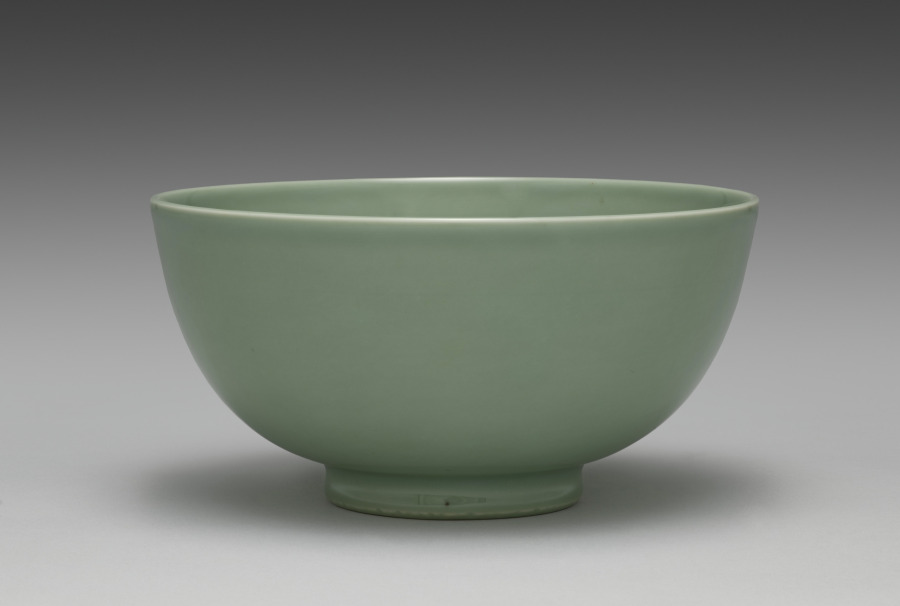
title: Sweets Bowl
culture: Japan, Meiji period (1868–1912)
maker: Seifū Yohei III (Japanese, 1851–1914)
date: 1893–1914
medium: Porcelain with green glaze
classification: Ceramic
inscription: 彫銘：清風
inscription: 共箱の箱書：（蓋裏）秘色窯菓子鉢 三世清風晟山作（印：帝室技藝員）襲（袭）四世清風與平識之（印：清風）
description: The box for this sweets bowl has an attestation by Yohei IV that it is a work by Yohei III and in the hisokuyō (C. mise yao), or “mysterious color ware,” style. In fact, as actual examples of mise ware were unknown in Yohei III’s time, he would have associated the color with the green-glazed ceramics of kilns at Longquan, also in Zhejiang Province, produced during the Yuan dynasty.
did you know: Many ceramics created by the Seifū Studio refer to and emulate Chinese ceramics in form and glazing.